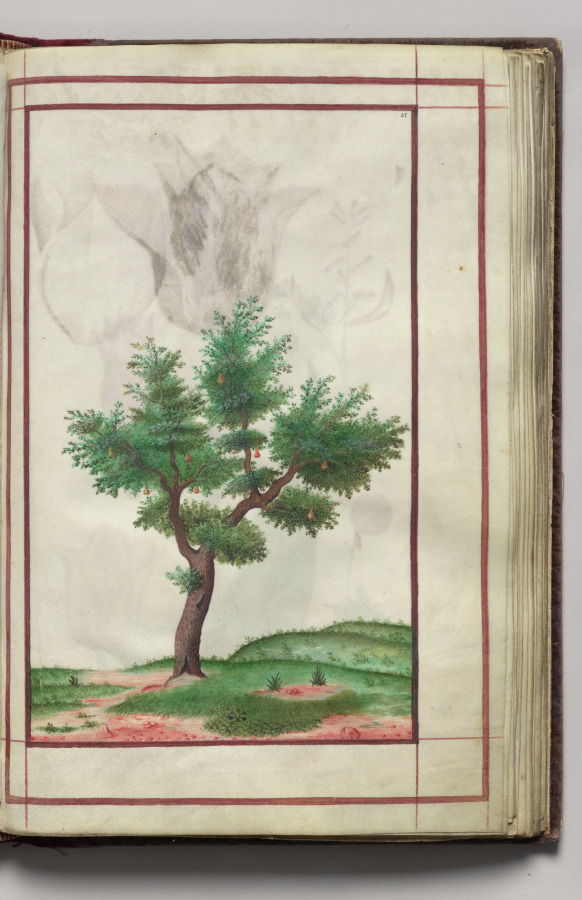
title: Pear Tree in Landscape, folio 13 (recto), from Florilegium (A Book of Flower Studies)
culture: France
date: 1608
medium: watercolor, ink, silver, and gold over occasional traces of pencil, on vellum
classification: Bound Volume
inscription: Dated: Poitiers 1608 (on frontispiece) Signed: On frontispiece in black ink, lower right: Van Kuyk Notation on drawing: Frontispiece: in pencil, lower margin: * élève de Van Kessel, peintre flammand (* in pencil also appears in front of Van Kuyk's name).